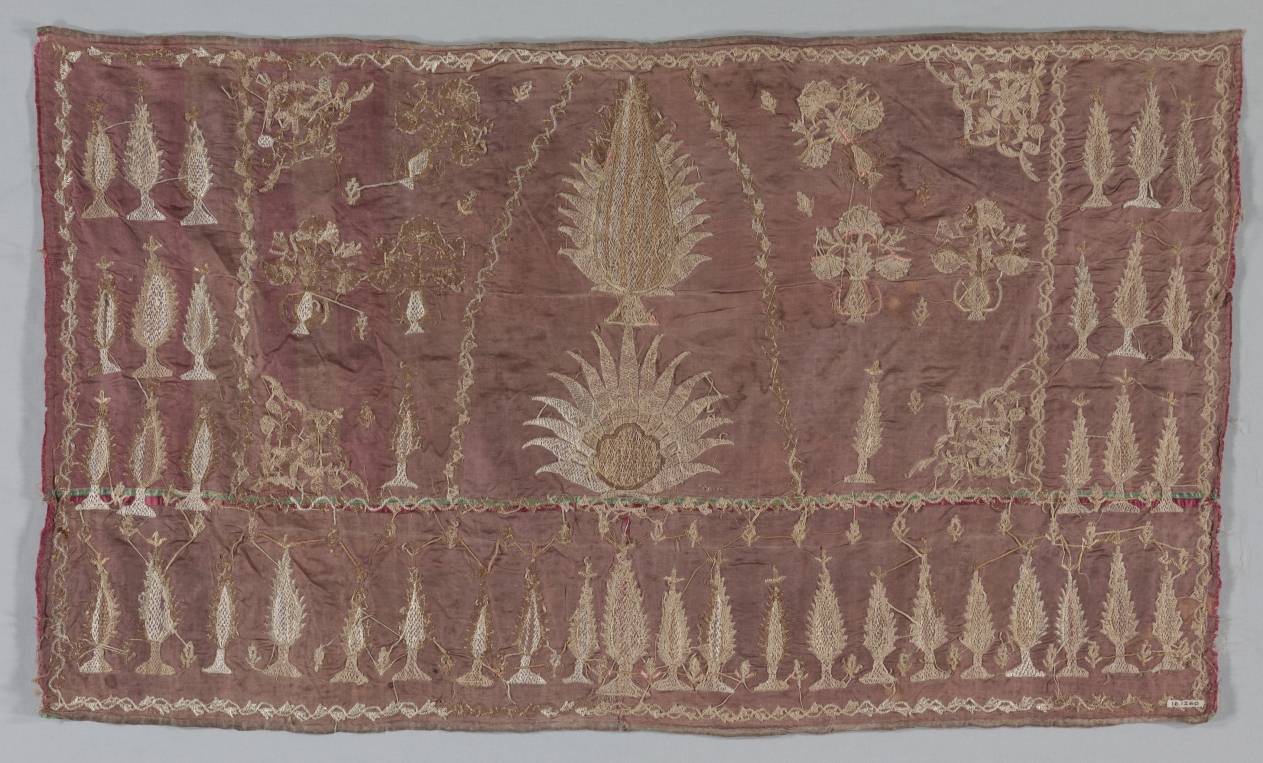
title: Embroidered Cover (?)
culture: Turkey, 18th-19th century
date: 18th-19th century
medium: embroidery: silver filé and gold strips over cotton thread, couched at edges by silk, on silk ground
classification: Embroidery